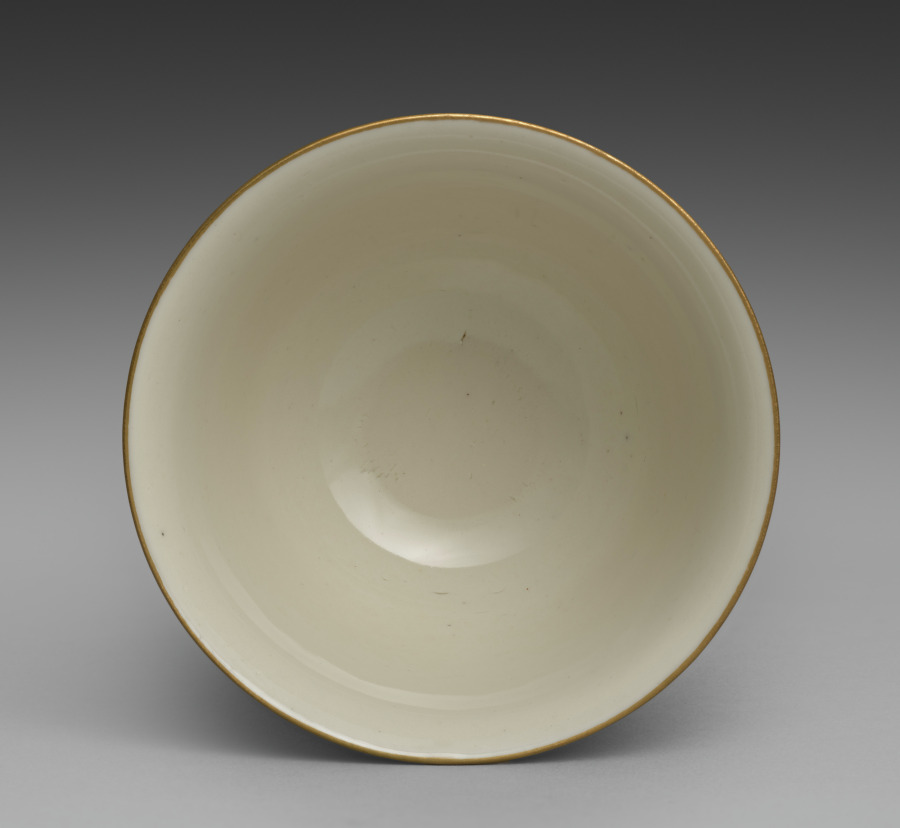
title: Drinking Cup from Dining Set with Plum Blossoms and Cracked-Ice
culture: Japan, Meiji period (1868–1912)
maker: Seifū Yohei II (Japanese, 1844–1878)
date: c. 1875–78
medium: Porcelain with molded designs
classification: Ceramic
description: Each item in this set has a delicate low-relief design of flowering plum branches over scattered, intersecting lines meant to resemble the cracked-ice surface of a frozen body of water and is signed on the base in gold pigment. While Yohei II produced many fine works in underglaze blue, like those produced by Kiyomizu Shichibei, he also made works in quite different styles later in his career, from the early 1870 s. In 1873, he was appointed purveyor to the Industrial Center of Kyoto Prefecture, a designation associated with Kyoto’s efforts to reach an international market through the port of Kobe; and from 1875 until his death, he was involved in national-level projects to present Japanese ceramics across the world. It was during this period that Yohei III was apprenticed to Yohei II, and it has been suggested that this set may in fact be an early example of Yohei III’s work, which he signed with his teacher’s name. Decorated with flowers resembling Japanese textile motifs, the set calls to mind the design of Yohei II’s pair of vases with plum blossoms in the Victoria and Albert Museum. Here, the elaborate trees created for a formal public exhibition setting have been translated into the approachable blossoms of the genteel domestic environment. While the designs are consistent across the pieces, each raised flower petal and pistil and each incised line in the ice was done by hand, so the cups, bowls, and dishes are similar yet unique. The bottoms of two boxes once identified the set’s owner, but the information has been deliberately obscured with black ink. However, inscriptions still visible appear to indicate two occasions, once at the end of July 1886 , and once again in June 1916 , when parts of the set were requested from Hokura in Niigata Prefecture. The location corresponds to a neighborhood in the present-day city of Jōetsu. The surname Tsuji 辻 also appears on a paper tag affixed to one of the box cloths. Future research may possibly reveal more about their provenance. A vase by Yohei III in a private collection combines the formal grandeur of the Yohei II vases in the Victoria and Albert Museum with the gentler design of this dining set, placing flowering plum trees against soft, scalloped-edge clouds resembling those in golden screens.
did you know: The dining wares have a creamy white coloration that the four boxes containing them identify as Korean in style.